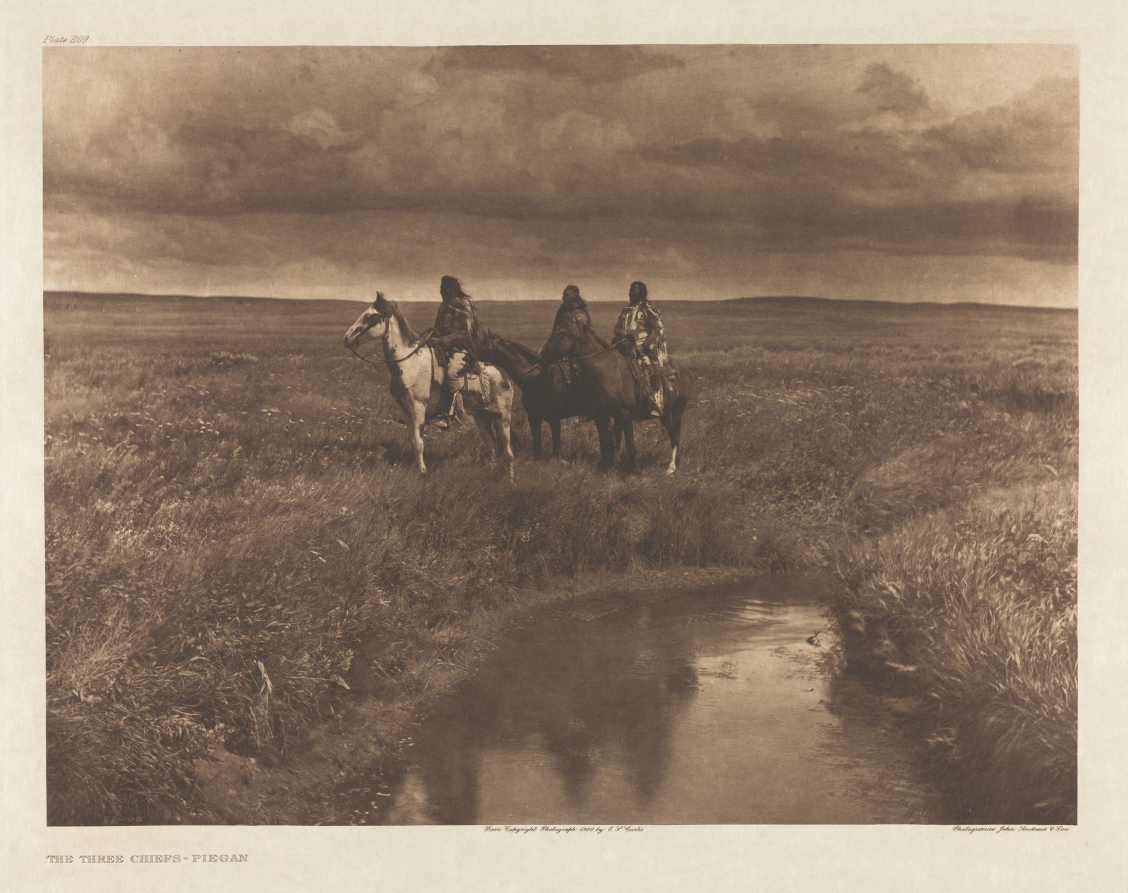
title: Portfolio VI, Plate 209: The Three Chiefs - Piegan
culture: America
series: The North American Indian: being a series of Portfolios picturing and describing the Indians of the United States, the Dominion of Canada, and Alaska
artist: Edward S. Curtis (American, 1868–1952)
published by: The University Press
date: 1900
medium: photogravure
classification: Portfolio